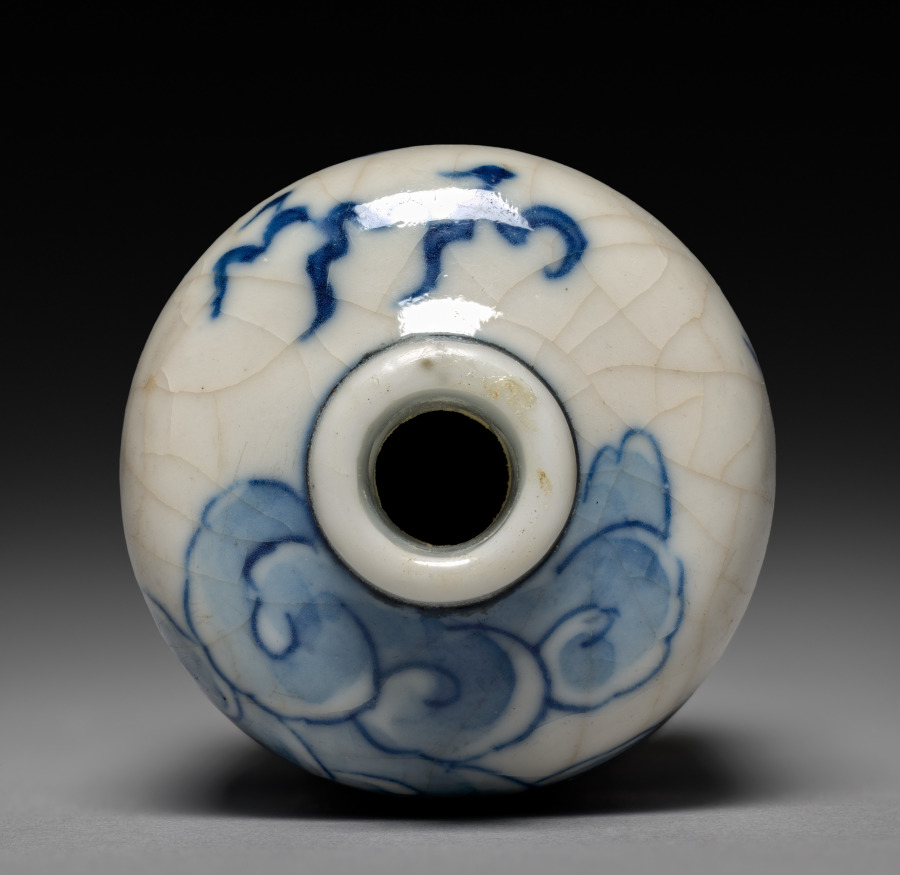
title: Snuff Bottle with Stopper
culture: China, Jiangxi Province, Jingdezhen kilns, Qing dynasty (1644–1911), Yongzheng reign (1722–35)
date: 1723–35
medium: porcelain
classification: Ceramic